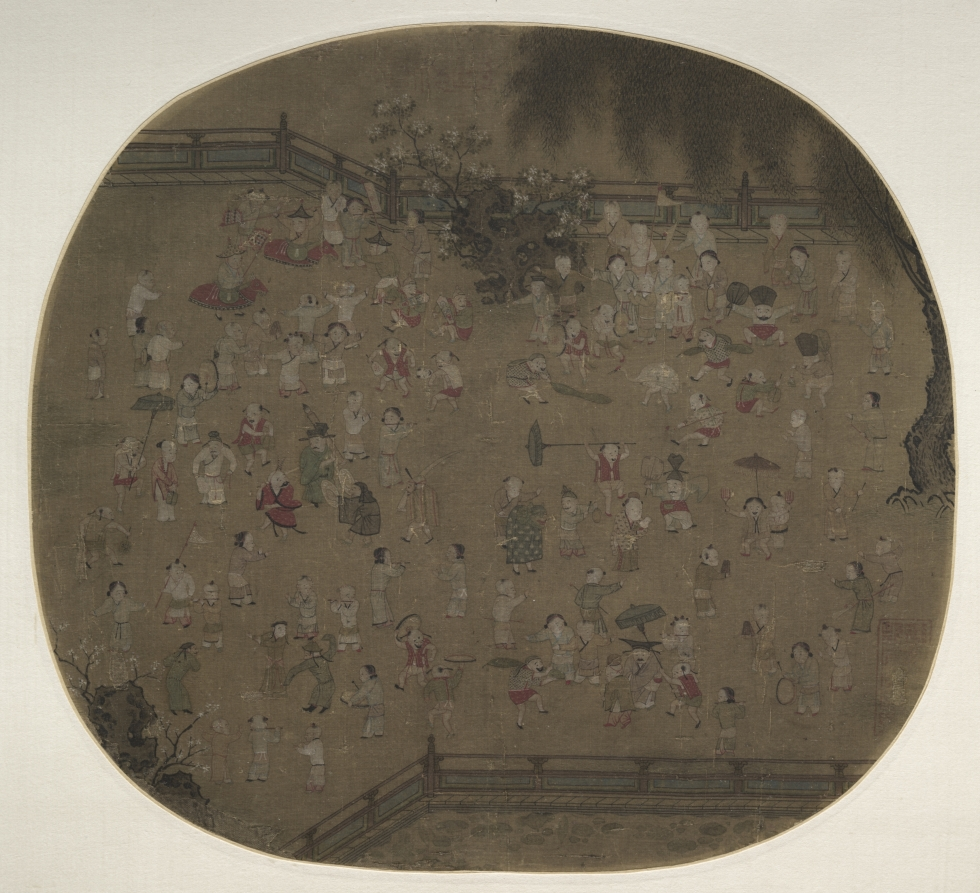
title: One Hundred Children at Play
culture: China, Southern Song dynasty (1127-1279)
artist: tradition of Su Hanchen (Chinese, active c. 1101–1125)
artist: tradition of Wang Juzhen (Chinese)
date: 1100s–1200s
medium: Album leaf; ink and color on silk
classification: Painting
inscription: 2 seals unidentified: one lower right and one top center.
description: Paintings on the “one hundred children” theme usually have numerous, if not exactly 100, children. A majority of the children here imitate the dress, manners, and activities of the adult world. Whatever the exact significance of the subject, the painter of this album leaf clearly intended it to be savored figure by figure. With seemingly inexhaustible invention, the artist characterized each performer in the colorful pageant with unique accoutrements and action. The avoidance of overlapping allows each figure to be seen in clear detail, while all the figures are organized into a coherent composition. Garden settings with decorative rocks, blossoming shrubs, graceful willows, and lotus ponds had become fairly standard environments for late 12th- to 13th-century scenes of palace ladies as well as of playing children.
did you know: Following a baby’s birth, ceremonies and festivities traditionally marked the baby’s successive attainment of thirty days, one hundred days, and one year in age. “One hundred children” paintings such as this album leaf would have been suitable for presentation on either of the latter occasions.